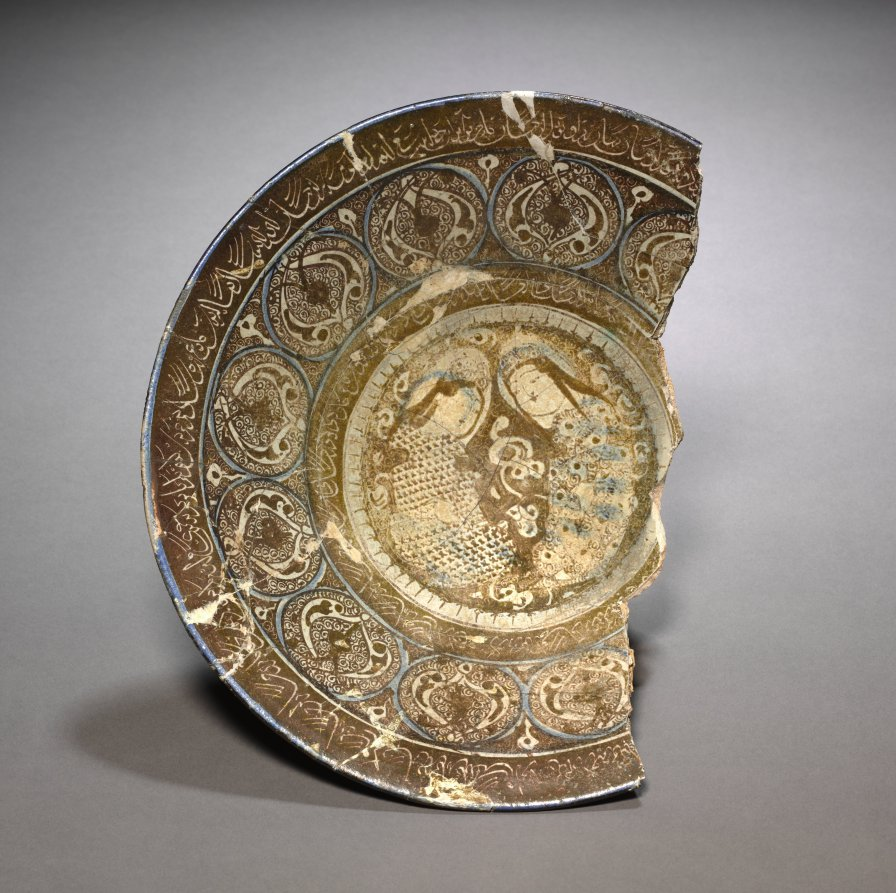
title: Plate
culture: Seljuk Iran, Rayy, or Syria, Raqqa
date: 1200s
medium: fritware with luster-painted design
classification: Ceramic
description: Fritware Where fine clay was unavailable, potters made a paste out of ground quartz, clay, and glass. When fired, the paste created a compact white material called fritware that approximated the appearance of porcelain.